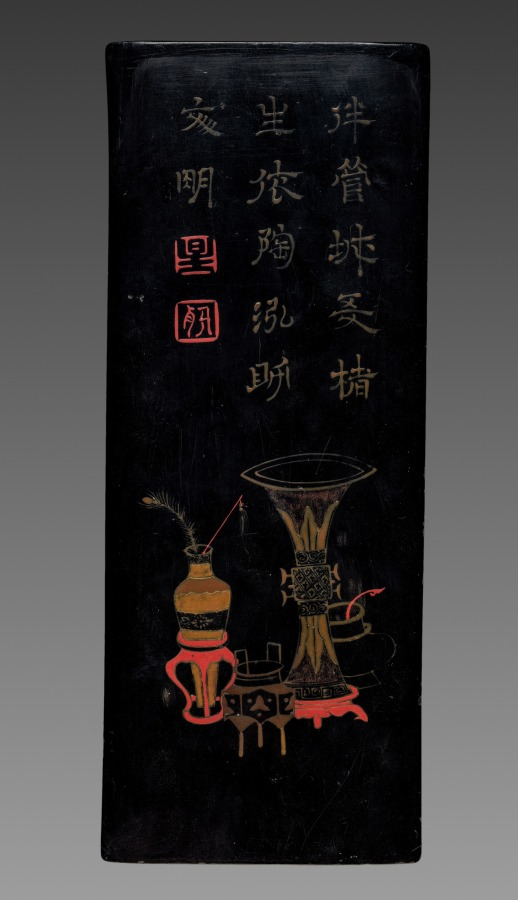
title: Ink Cake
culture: China, Qing dynasty (1644-1911)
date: 19th Century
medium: ink cake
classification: Miscellaneous